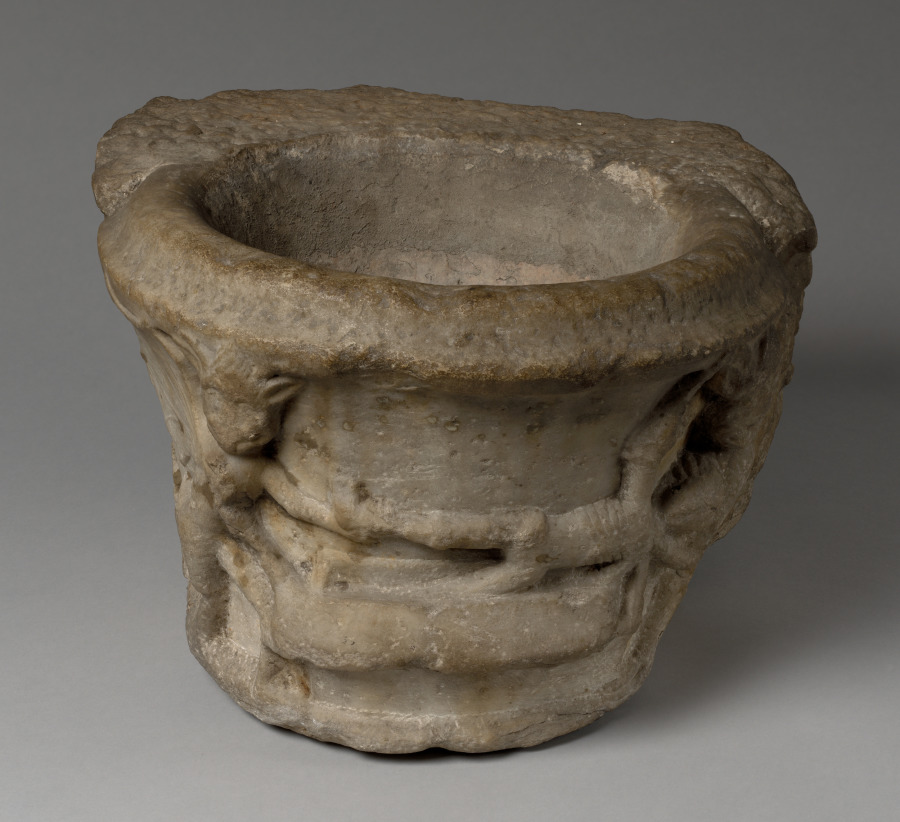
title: Holy Water Font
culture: Southern France, late 15th century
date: late 1400s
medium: marble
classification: Sculpture